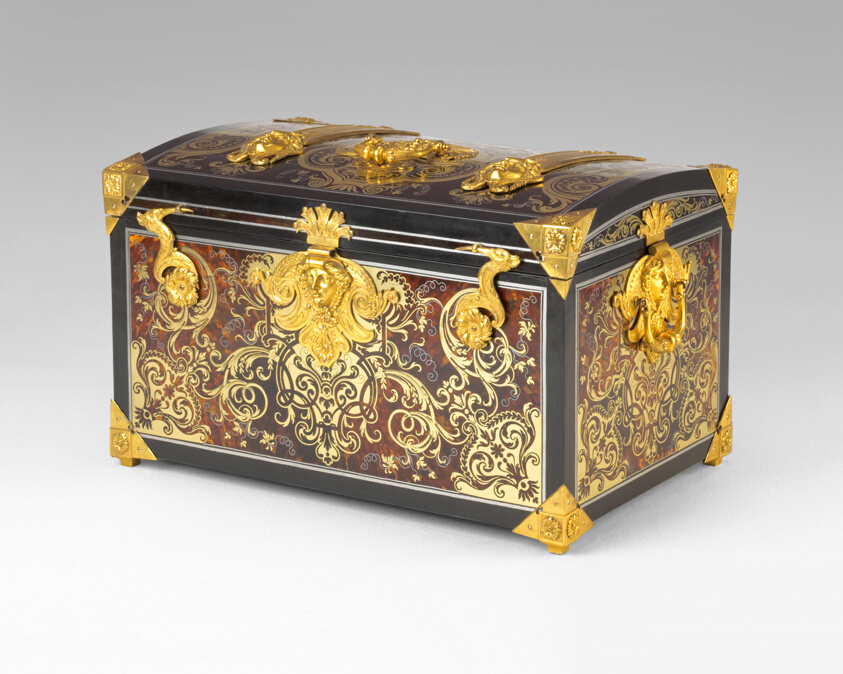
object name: Furniture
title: Coffer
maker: Attributed to André-Charles Boulle (French, 1642–1732); France, Paris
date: 1700/20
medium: Oak, tortoiseshell, brass, pewter, ebony, and gilt-bronze mounts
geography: France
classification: chest (case furniture); case furniture; furniture; european decorative arts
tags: furniture, birds, cranes, lions, animals, faces, filigree, gold (color)